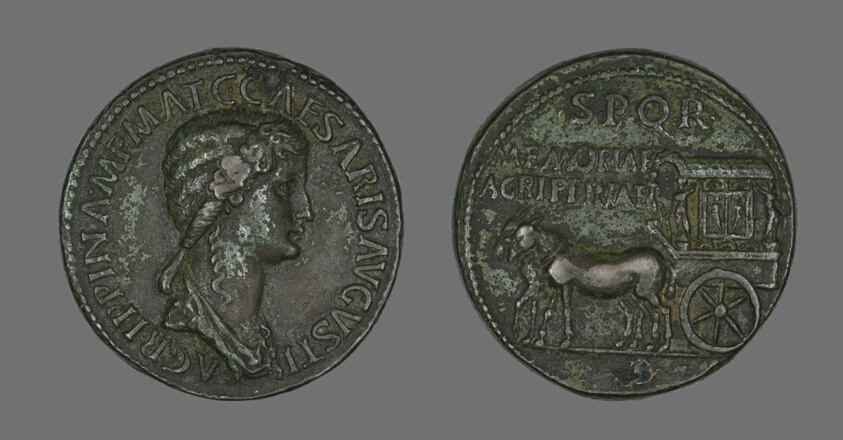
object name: Coin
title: Sestertius (Coin) Portraying Empress Agrippina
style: imperial (roman), ancient, roman (ancient, style or period)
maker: Roman, minted in Rome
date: 37-41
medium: Bronze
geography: Rome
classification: coin; ancient art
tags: Chariots